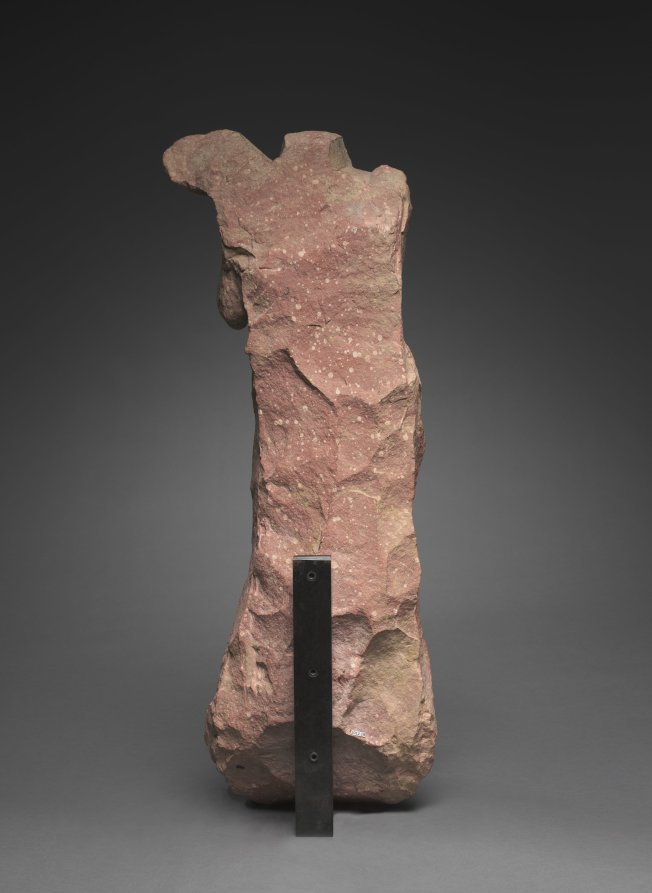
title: Female Devotee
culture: India, Mathura, Kushan period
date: c. early 100s CE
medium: sandstone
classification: Stone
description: This female devotee is depicted approaching the place of worship carrying a covered wicker tray that would have been filled with fresh flower garlands.The sense of dynamism and power in the stance, the masterful transformation of stone into the suppleness of youthful, voluptuous flesh barely interrupted by clothing, as well as touches of naturalism—seen in the slipping of the large bangle down the spiral cuff—are all stylistic characteristics of female figures made during the early 2nd century.